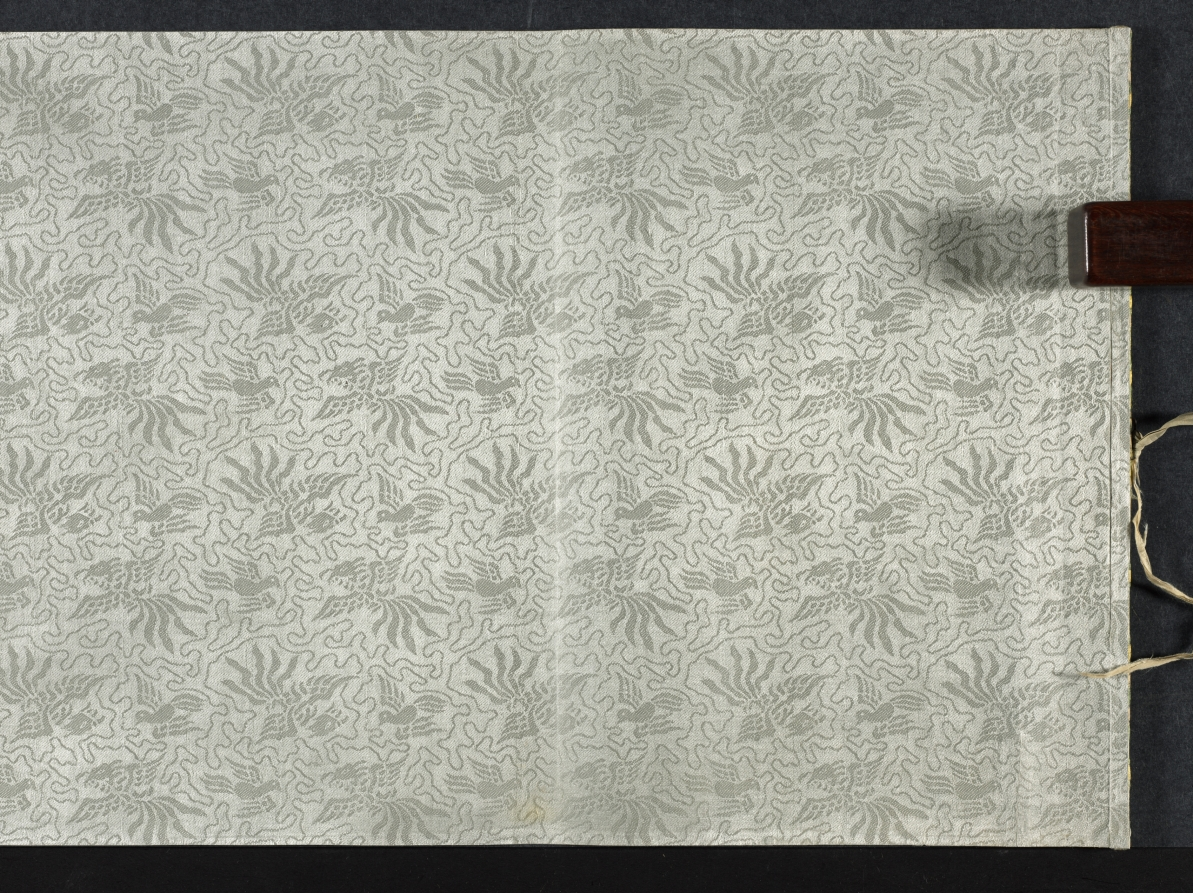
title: Chrysanthemums and Cabbage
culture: China, Ming dynasty (1368–1644)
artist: Tao Cheng (Chinese, active c. 1471–after 1502)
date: c. 1486 or before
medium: handscroll, ink and slight color on paper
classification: Painting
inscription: Artist's seal at beginning of painting: Yun hu 雲湖. Title by Wang Wenzhi 王文治 (1730–1802), date 1756. 2 seals of Wang Wenzhi 王文治 (1730-1802); 3 seals of Ku Yün (n. d.)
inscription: Section A (Chrysanthemums): 1 poem and 1 seal of Zhang Yuanzhen 張元禎 (1437–1507) - Jinshi, 1461; 1 poems and 3 seals of Ni Yue 倪岳 (1444–1501) - Jinshi, 1464; 1 poems and 2 seals of Zhao Xiang 趙祥 (life dates unknown) - Jinshi, 1469; 1 poems and 1 seals of Wu Xixian 吳希賢 (1437–1489) - Jinshi, 1464; 1 poems and 1 seals of Lü Chang 呂㦂 (1449–1511) - Juren, 1471; 1 poems and 3 seals of Fu Han 傅瀚 (1435–1502) - Jinshi, 1464; 1 poems and 1 seals of Feng Jue 馮珏 (life dates unknown) - Jinshi, 1478.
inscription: Chrysanthemums section, poem 1, by Zhang Yuanzhen 張元禎 (1437–1507): Several bushes of chrysanthemums grow in front of the Five-Willow Cottage,/ The yellow ones are really yellow and the white ones white./ This affable and decent fellow, young in years and unsophisticated,/ Has snapped one of the branches to dip in ink. (The Five-Willows Cottage was the home of the poet Tao Qian 陶潛 (Tao Yuanming 陶淵明, AD 365-427).) Chrysanthemums section, poem 2, by Ni Yue 倪岳 (1444–1501): Where at the Eastern Fence can you grieve for the Soul of the Xiang River?/ A man of upright character is mourned within the traces of ink./ White jade with a slight flaw would be a grievance forever,/ Later men should understand why even the roots of the flowers are washed. (Eastern Fence refers again to the poet Tao Qian 陶潛, while the Soul of the Hsiang River refers to the poet Qu Yuan 屈原 (c. 340–278 BC).) Chrysanthemums section, poem 3, by Zhao Xiang 趙祥 (life dates unknown): A clump of chrysanthemum grows in front of the bamboo pavilion,/ The winds of many autumns have blown since we parted beyond the river./ Straining wine through the official's cap of Tao [Qian] to prolong autumn's pleasures,/ The mists and clouds of ten thousand miles belong to the intoxicated. Chrysanthemums section, poem 4, by Wu Xixian 吳希賢 (1437–1489): It is a different spring if mulberry is planted during the latter part of the year,/ The dust of the world originally did not drop on clothing./ Who spills out ink under the Eastern Fence/ And paints so freely this portrait of chrysanthemums for the venerable Sir Tao? Chrysanthemums section, poem 5, by Lü Chang 呂㦂 (1449–1511): This full tray of ink for painting [flowers] at the Eastern Fence;/ Their whiteness or yellowness is not essential in capturing their beauty./ I don't have to go to Jiangnan to see them myself./ At my old house grow two or three branches. Chrysanthemums section, poem 6, by Fu Han 傅瀚 (1435–1502): Who daubed autumn flowers with ink/ As if they were dark dew on a branch tip only vaguely seen at evening?/ After the lazy clouds disperse, no one paints;/ A certain unconventionality pervades this painting. Chrysanthemums section, poem 7, by Feng Jue 馮珏 (life dates unknown): To satisfy his hunger, [the chrysanthemums] have at times entered the poetry of Qu Yuan;/ Taking up the wine cup, it felt close to Tao Qian./ [With them I am like] a lonely root sustained by deep water/ Or an old man to whose hair the color of youth returns.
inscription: Section B (Cabbage): 1 poem and 1 seal of Cai Qi 蔡圻 (life dates unknown) - degree information not known; 1 poems and 3 seals of Ni Yue 倪岳 (1444–1501) - Jinshi, 1464; 1 poem and 3 seals of Jiao Fang 焦芳 (1436–1517) - Jinshi, 1464; 1 poem and 3 seals of Li Dongyang 李東陽 (1447–1516) - Jinshi, 1464; 1 poems and 1 seals of Wu Xixian, signed “Xixian” 吳希賢 - Jinshi, 1464; 1 poems and 3 seals of Fu Han 傅瀚 (1435–1502) - Jinshi, 1464; 1 poems and 1 seals of Lü Chang 呂㦂 (1449–1511) - Juren, 1471; 1 poems and 2 seals of Zhao Xiang 趙祥 (life dates unknown) - Jinshi, 1469; 1 poems and 1 seals of Feng Jue 馮珏 (life dates unknown) - Jinshi, 1478.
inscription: Cabbage section, poem 1, by Cai Qi 蔡圻 (life dates unknown): The ink splashes are fresh from a frosty brush dipped in pond water;/ I can visualize that time when Yunhu 雲湖 [Tao Cheng] first showed his talents./ I lament the places where I scribbled before,/ Who would open them to inscribe a poem? (The first line is an allusion to the famous Jin dynasty calligrapher Wang Xizhi 王羲之 (AD 303-361), who practiced calligraphy so diligently at the edge of a pond that the water turned black with ink.) Cabbage section, poem 2, by Ni Yue 倪岳 (1444–1501): After rain the vegetables begin to grow;/ How are the colors of the masses lately!/ Once you get used to them, the tastiest parts are the ends of the roots;/ I don't know if they can be used for "seasoning soup." ("Seasoning soup" is an allusion to the statesmanship of a chief minister.) Cabbage section, poem 3, by Jiao Fang 焦芳 (1436–1517): This crop of purple stalks and green leaves is late and irregular;/ Now the rainy season is over for the Eastern Garden./ All the nobles nowadays dine on meat;/ Who of them knows the flavor of this [cabbage]. Cabbage section, poem 4, by Li Dongyang 李東陽 (1447–1516): It's always helped the honest man to sober up after drinks./ I intend to go to the deepest part of the stream-crossed garden/ To refresh myself in the fragrance and dew of evening. Cabbage section, poem 5, by Wu Xixian 吳希賢 (1437–1489): After rain, the white silk is filled with fragrant vegetables;/ How many times this happens in Mr. Tao's paintings./ On whom will you depend to present a memorial to the ruler?/ Don't let this color emerge on the faces of the people. (The last line is meant as a warning to officials: the color of the vegetables (green) may be pleasing in itself, but when it emerges on the faces of the starving poor, it signifies a badly governed world.) Cabbage section, poem 6, by Fu Han 傅瀚 (1435–1502): For twenty years I have feasted on the excellent mutton of an official;/ Yet I talk and dream about the garden and its vegetables./ Do not merely say it is good to chew the root of the cabbage--/ You must taste to understand what poverty is. Cabbage section, poem 7, by Lu Chang 呂㦂 (1449–1511): The capital is never a place for an apprentice in the "garden of scholarship."/ Who would write about gardens and vegetables on an examination paper?/ I've walked throughout the country in spring;/ Make sure the people don't show this color. Cabbage section, poem 8, by Zhao Xiang 趙祥 (life dates unknown): After a wash of rain, the spring garden is still in order;/ The flavor [of the cabbage] is more suitable with a small drink and the hum of a tune./ The rich and powerful in their mansions consume dish after dish of meat;/ Vegetarian food is known only by the scholars. Cabbage section, poem 9, by Feng Jue 馮珏 (life dates unknown): A new cabbage is nourished with dew;/ It takes a long time to grow and mature./ The business of "seasoning the soup" is your responsibility;/ Better command the gardener to take care [of the cabbages]. trans. HK/LYSL/WKH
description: On an autumn day in Beijing, Tao Cheng had a gathering with a group of scholar-officials and created two paintings in a spontaneous, casual style. The first depicts chrysanthemums, slender bamboo stalks, and a rock in monochrome ink. Tao applied light colors for the second painting that depicts cabbage. Tao deliberately placed the images on the first sections of the paper so that his honorable guests could add their poetic inscriptions inspired by his imagery. In the first section to the right, all seven poetic inscriptions refer to the beloved poet and recluse Tao Qian (also called Tao Yuanming, AD 365–427) who was particularly known for his profound love for chrysanthemum flowers. Most of the inscriptions in the second section express sympathy for the poor, since cabbage is the main ingredient in their humble food. Taken together, the poems and paintings allude to the life and responsibilities of the scholar-official: the importance of both an upright character and a concern for the poor citizens in order to achieve good government.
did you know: Eminent calligrapher Wang Wenzhi 王文治 was only 27 sui when he wrote the title in 1756.